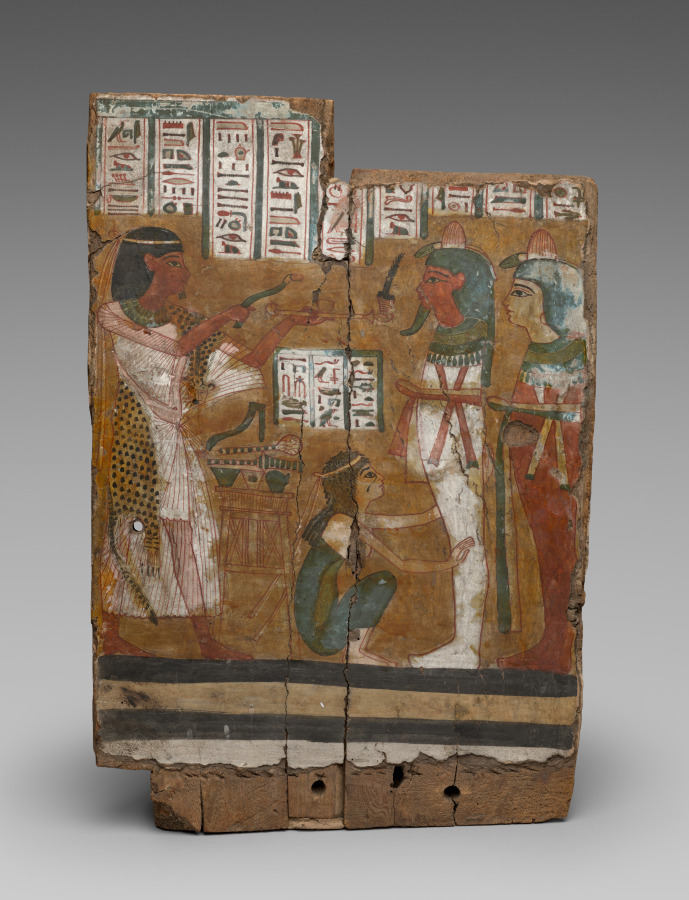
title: Side Panel from the Coffin of Amenemope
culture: Egypt, Thebes, Third Intermediate (1069–715 BCE), Dynasties 21–22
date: c. 976–889 BCE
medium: gessoed and painted sycamore fig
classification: Funerary Equipment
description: This panel illustrates one of the same scenes shown on the inside of Nesykhonsu’s coffin, allowing us to compare different artist’s styles. On the right stand the mummies of the priest Amenemope and his wife, Taditkhonsu. Their daughter, called "the lady of the house, Mutemperes," crouches before them with her hands wrapped around Amenenope’s legs in a traditional gesture of mourning. On the left, a priest, dressed in his finest linen garments and panther skin, holds in his upraised hands an incense burner and a curious curved implement typically associated with the "opening of the mouth" ritual, in which the mummy’s mouth was magically opened so that the deceased person could take in food and thus be brought back to life.